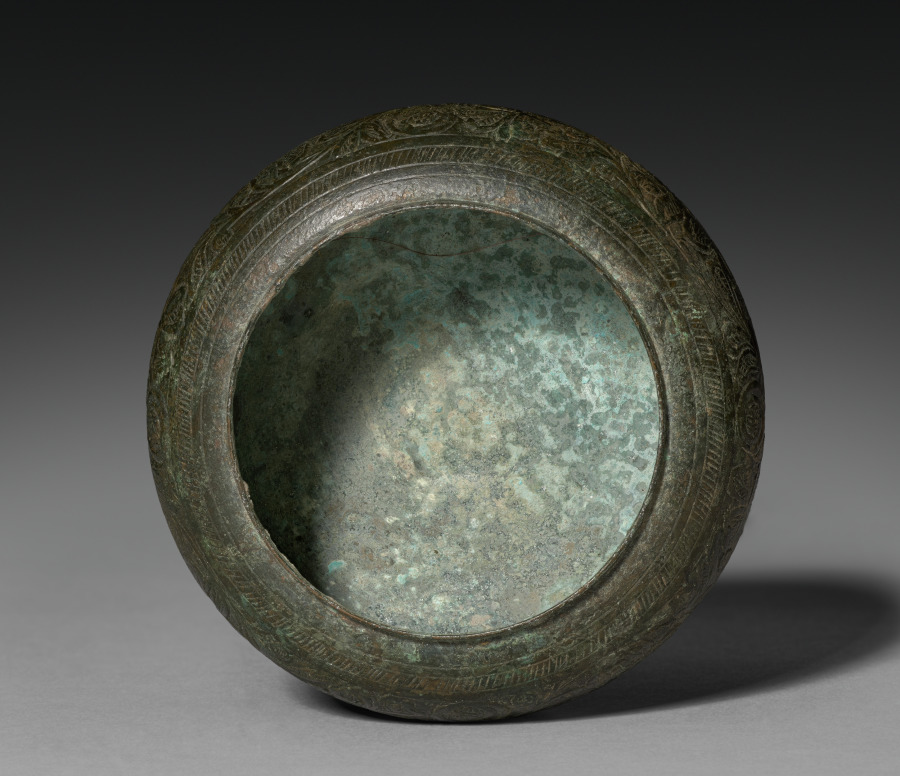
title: Reliquary Box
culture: Pakistan, Gandhara, probably Swat, late Kushan period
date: 200–400 CE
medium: bronze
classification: Metalwork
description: This casket in bronze represents the great variety of reliquary caskets. It is round, has a low foot, and is covered with a lid (with raised handle) that fits over the vessel rather than being inset. It is a traditional shape frequently encountered in Gandharan reliquaries, but its slight flattening and elaborate decoration imply a slightly late date. A central band of a floral creeper decorates the main body of the box and its lid, and is framed on both sides by narrower fluted bands. This type of freehand design is characteristic of the late Kusana-early Gupta period. Similar floral patterns are found in another CMA object (1972.164), the lid of a box showing combat between a man and a lion, which also dates to a later period. There the design fills the vacant areas in the busy composition. This pattern, however, has its antecedents in the Begram ivories . which, according to most sources, pre-date the Sasanian invasion of the mid-third century AD. Therefore, it can be assumed that this type of floral decoration was already in use in the third century and that this reliquary box probably dates to the third-fourth century AD. The bronze alloy, in its somewhat silverish-metallic appearance, seems to be very close to the material used in the Swat bronzes, which suggests that Swat may also be the provenance for this reliquary.